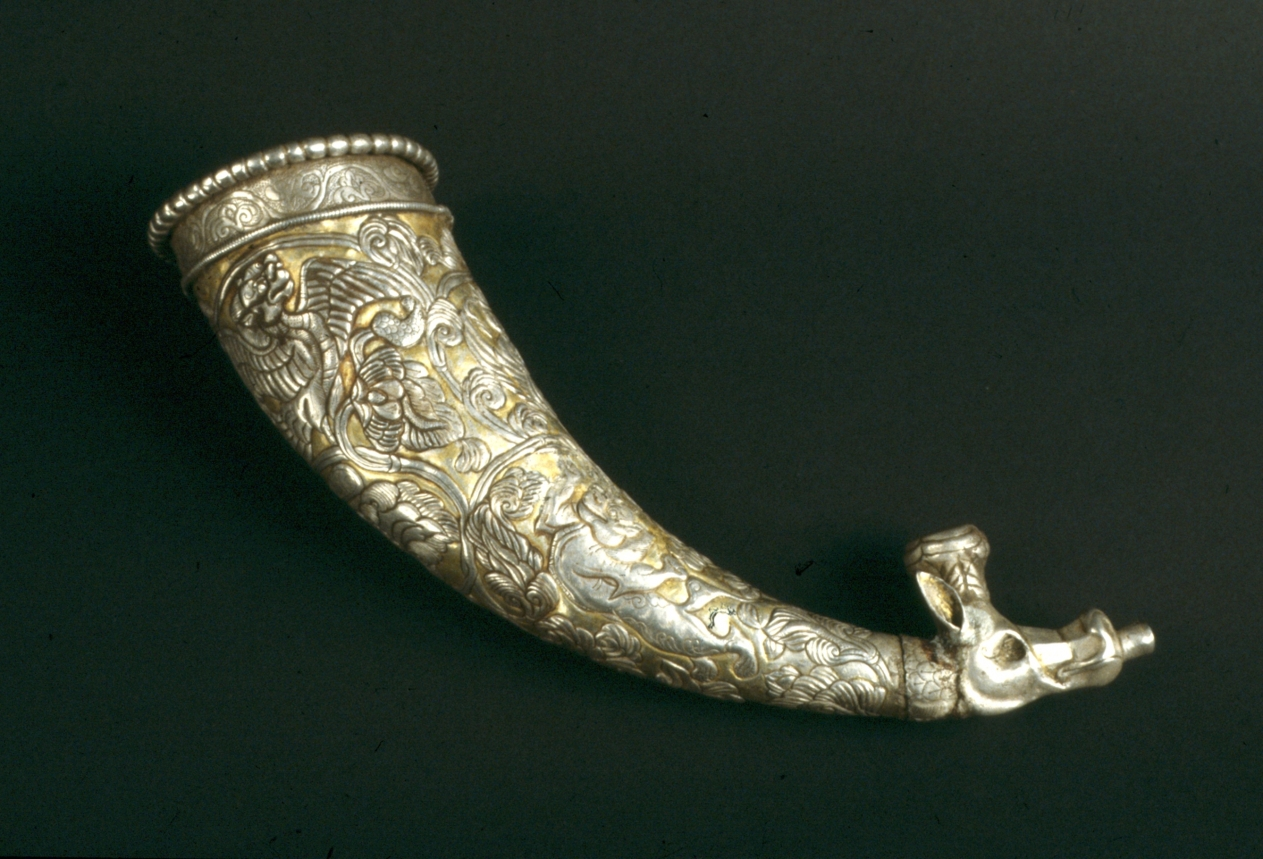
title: Rhyton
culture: Central Asia (Sogdiana) or Tibet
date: c. late 600s–early 700s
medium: silver with gilded foil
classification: Silver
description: The form of the animal-headed rhyton as a drinking vessel and the use of silver are evidence of cultural exchange with Persia, while the lush, luxurious quality of the design and the form of the lions and curling dragon on one side of the decanter reveal an awareness of Chinese forms. Poured into the large opening at the top of the horn, wine then flowed out through the small tube held between the parted lips of a bovine-like animal. To keep from spilling, drinkers could stop the flow of the liquid by holding a thumb over the lower aperture.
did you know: This drinking horn was a communal vessel which guests would pass around to share wine at parties.